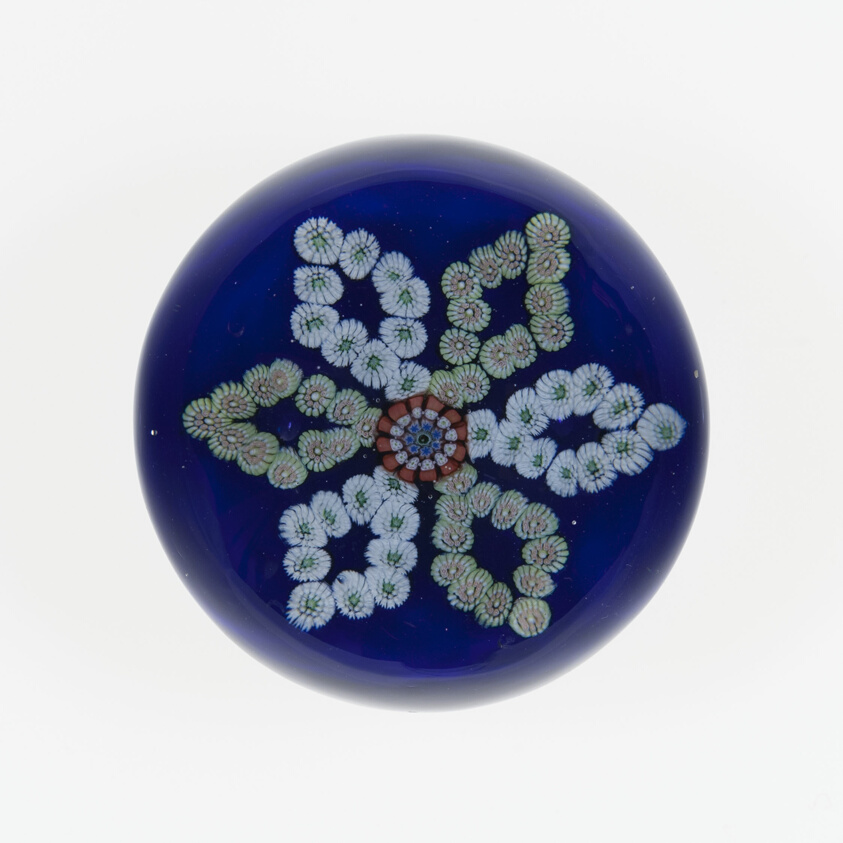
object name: Glass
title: Paperweight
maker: Saint-Louis Glassworks (Cristalleries de Saint-Louis); Lorraine, France, founded 1586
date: c. 1845–55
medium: Glass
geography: Saint-Louis-lès-Bitche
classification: paperweight; millefiori; european decorative arts; glass